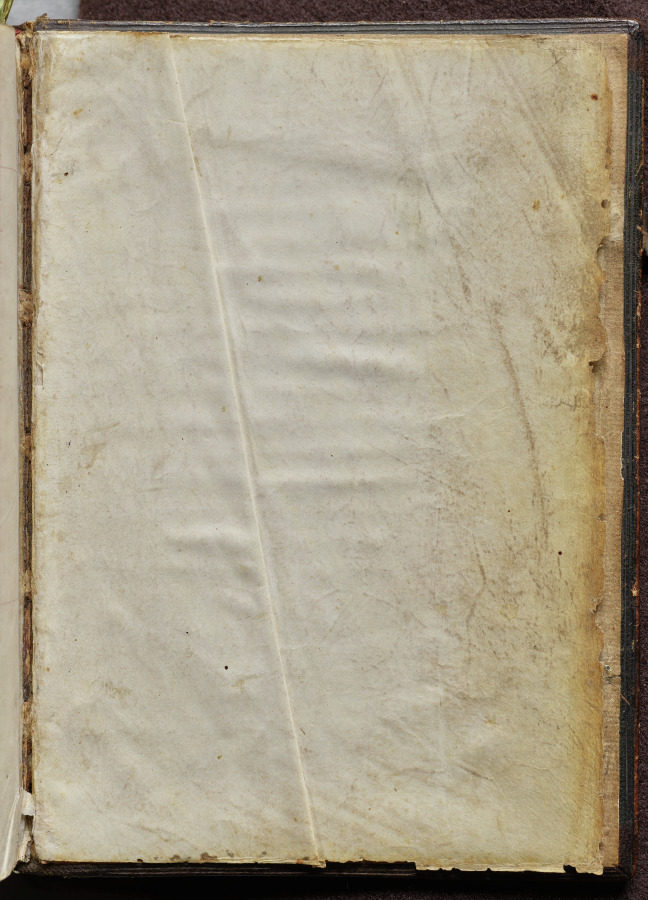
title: Hours of Charles the Noble, King of Navarre (1361-1425), Blank Fly Leaf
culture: France, Paris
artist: Master of the Brussels Initials and Associates (French)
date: c. 1405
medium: ink, tempera, and gold on vellum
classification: Bound Volume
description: This precious book was highly prized by its owner, Charles III, King of Navarre, a French-born prince whose coat of arms is painted on 20 folios. Charles visited Paris on numerous occasions and likely acquired this volume there in 1404. Paris was the center of the European book trade at the time and attracted illuminators from many parts of Europe. This manuscript represents one of the most remarkable fusions of French and Italian taste in book illumination. Though conforming to Parisian standards, most of the book’s major miniatures are the work of the Brussels Initials Master, an Italian illuminator who previously worked in Bologna and Padua.